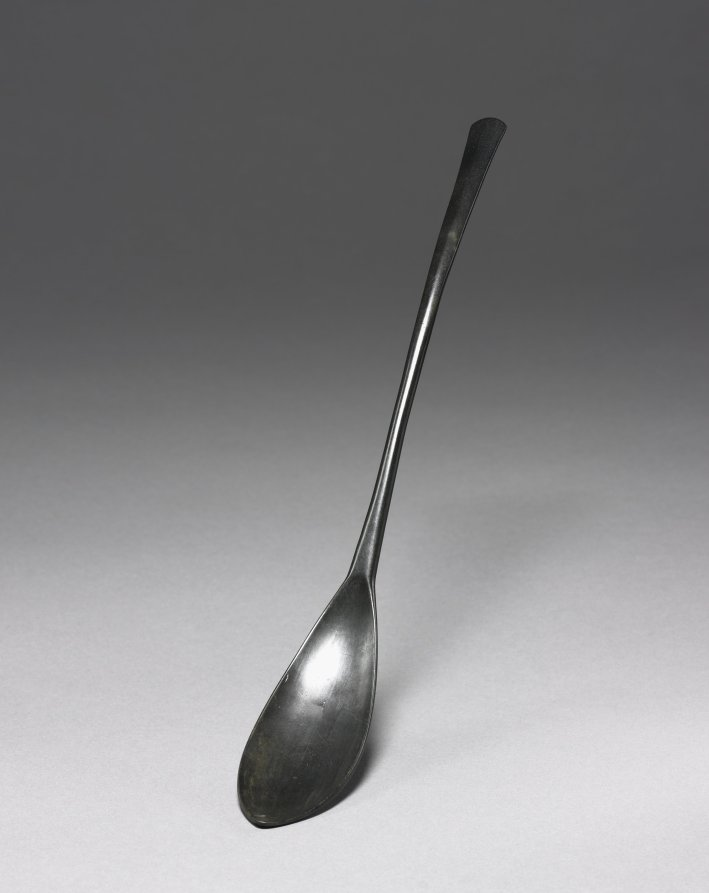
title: Spoon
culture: Korea, Goryeo dynasty (918–1392)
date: 918–1392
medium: silver bronze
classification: Metalwork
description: Celadons, spoons, seals, and bronze mirrors were the most common burial objects in tombs during the Goryeo period (918–1392). Furnishing tombs with an elaborate assemblage of objects was believed to honor and comfort the newly dead. Generally, Goryeo tombs were left untouched until the late 19th century. During the colonial period (1910–45), however, Japanese archaeologists hastily excavated the tombs located in Kaeseong, the former capital of the Goryeo period. Scholars recently have proposed that toward the end of the 14th century, Koreans enjoyed meat-based soups more than any other dishes, explaining why many more spoons than chopsticks were buried in tombs.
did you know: Bronze spoons are the most common burial item. Scholars have proposed that toward the end of the 14th century, Koreans enjoyed meat-based soups more than any other dishes, explaining why spoons became common household items as well as burial goods.